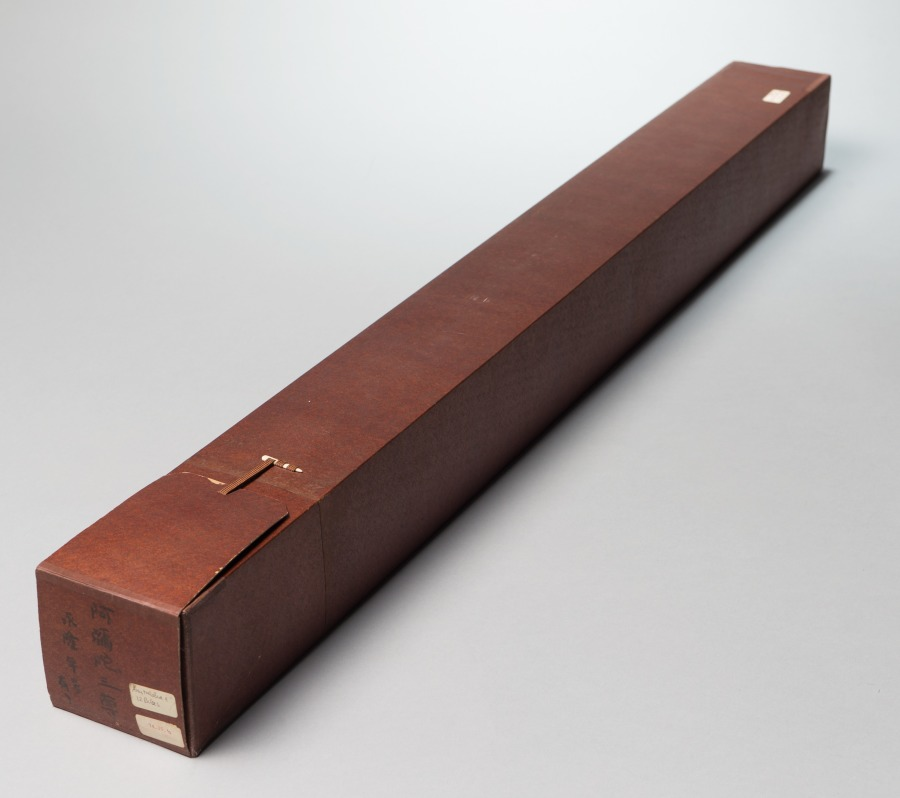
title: Buddha Amitābha with Two Attending Bodhisattvas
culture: China, Southern Song dynasty (1127-1279)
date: 1200s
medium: Hanging scroll; ink and color on silk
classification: Painting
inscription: 南無阿彌陀佛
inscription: 沙門善導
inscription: 觀世音菩薩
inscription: 大勢至菩薩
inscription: 永隆元年十月十五日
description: The supreme deities that rule over the Western Paradise—Amitābha (阿彌陀 in Chinese), Avalokiteśvara (Guanyin 觀音), and Mahāsthāmaprāpta (Dashizhi 大勢至)—are here enclosed within a circle of light. To secure entry into that paradise for Buddhist followers of the Pure Land sect, one must recite the phrase namo amituofo (南無阿彌陀佛, Homage to the Buddha Amitābha). Here the phrase is repeated 10 times in calligraphy above the figures, reinforcing the need for continual recitation.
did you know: Each line of calligraphy, which invokes the Buddha's name, emerges from a lotus blossom.